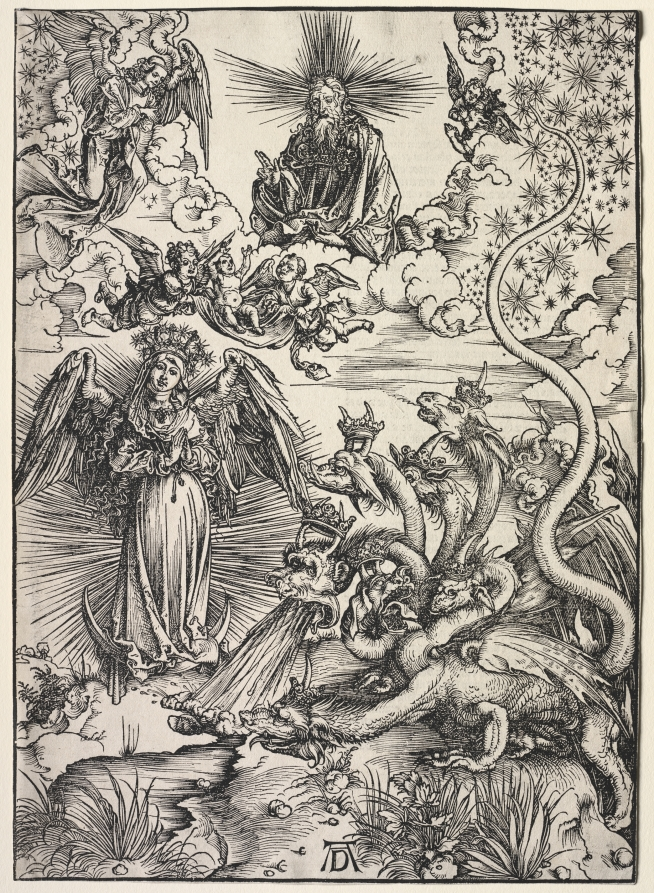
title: Revelation of St. John: The Woman Clothed with the Sun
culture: Germany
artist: Albrecht Dürer (German, 1471–1528)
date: 1511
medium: woodcut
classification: Print